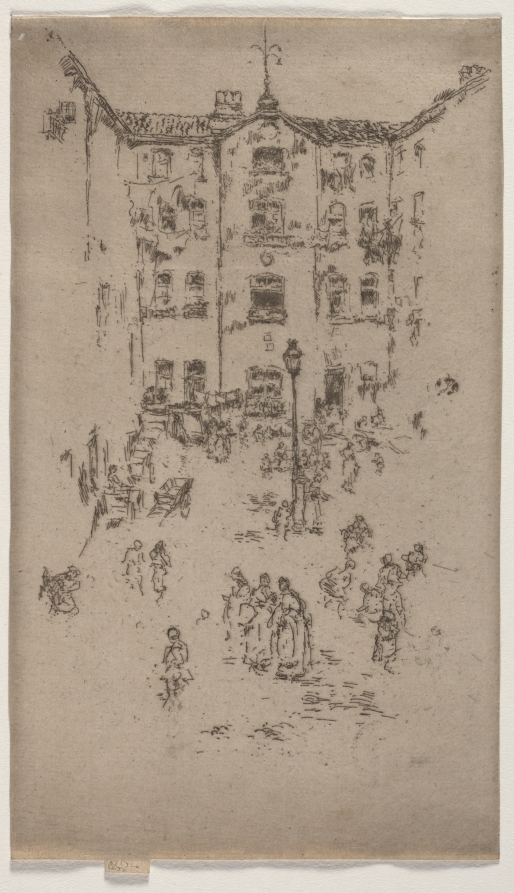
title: Courtyard, Brussels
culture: America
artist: James McNeill Whistler (American, 1834–1903)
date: 1887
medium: etching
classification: Print